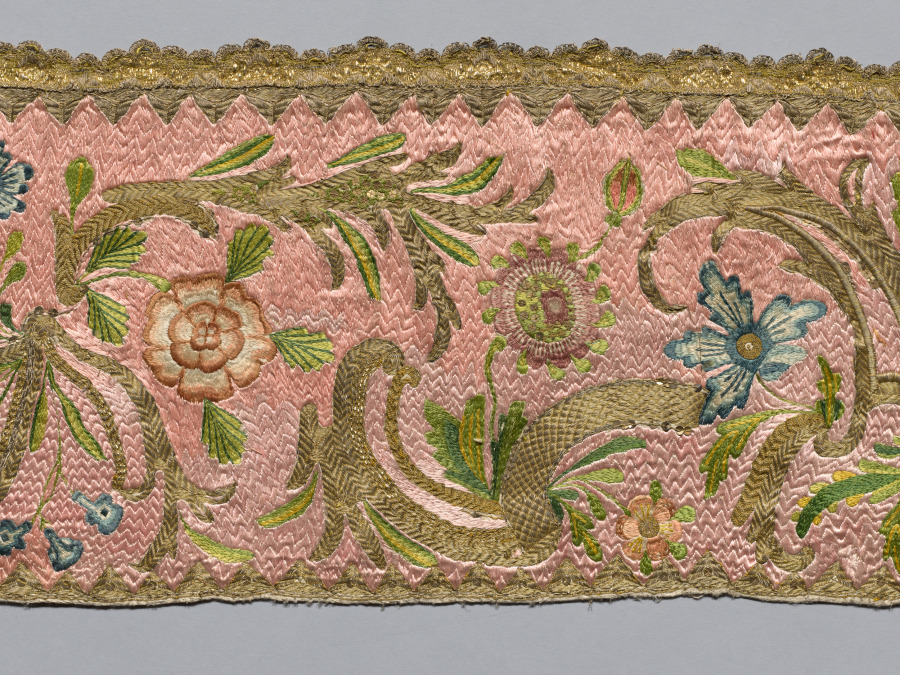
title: Embroidered Strip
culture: Italy, 18th century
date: 1700s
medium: embroidery, silk and gold thread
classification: Embroidery